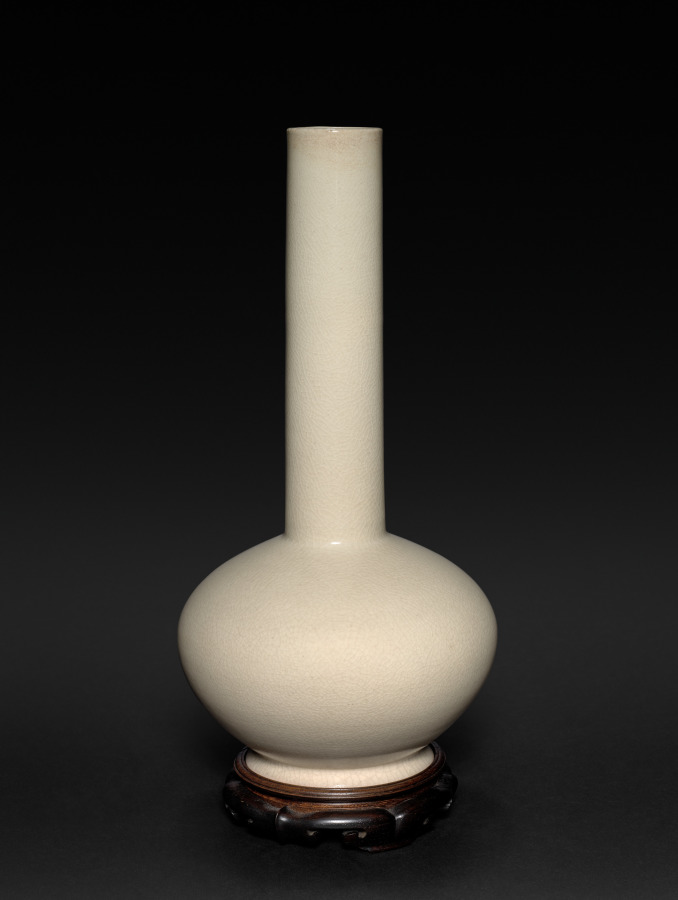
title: Long-Necked Vase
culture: Japan, Meiji period (1868–1912)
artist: Seifū Yohei III (Japanese, 1851–1914)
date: 1893–97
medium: Stoneware with crackled glaze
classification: Ceramic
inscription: 大日本清風造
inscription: 帝室技芸員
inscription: 清風盧人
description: The glazing of this long, narrow-necked and bulbous-based vase has a network of shallow cracks, created when the glaze fractured as it cooled from firing. It is called a cracked-ice pattern or glaze, since the effect resembles the surface of a frozen lake. The cracks here are of a consistently high density throughout the vessel. This pattern is observed also in the transparent glaze of some Kyoto ware, in some of Yohei III’s green glazes, and in some of his vessels emulating Chinese forms. The interior of the box lid has an attestation to its authenticity by Yohei IV, and the footring is inscribed Seifū of Great Japan (Dai Nihon Seifū) in iron black.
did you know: Seifū Yohei III apprenticed in the Seifū studio, married into the family, and later adopted the Seifū Yohei name, when he became head of the studio.